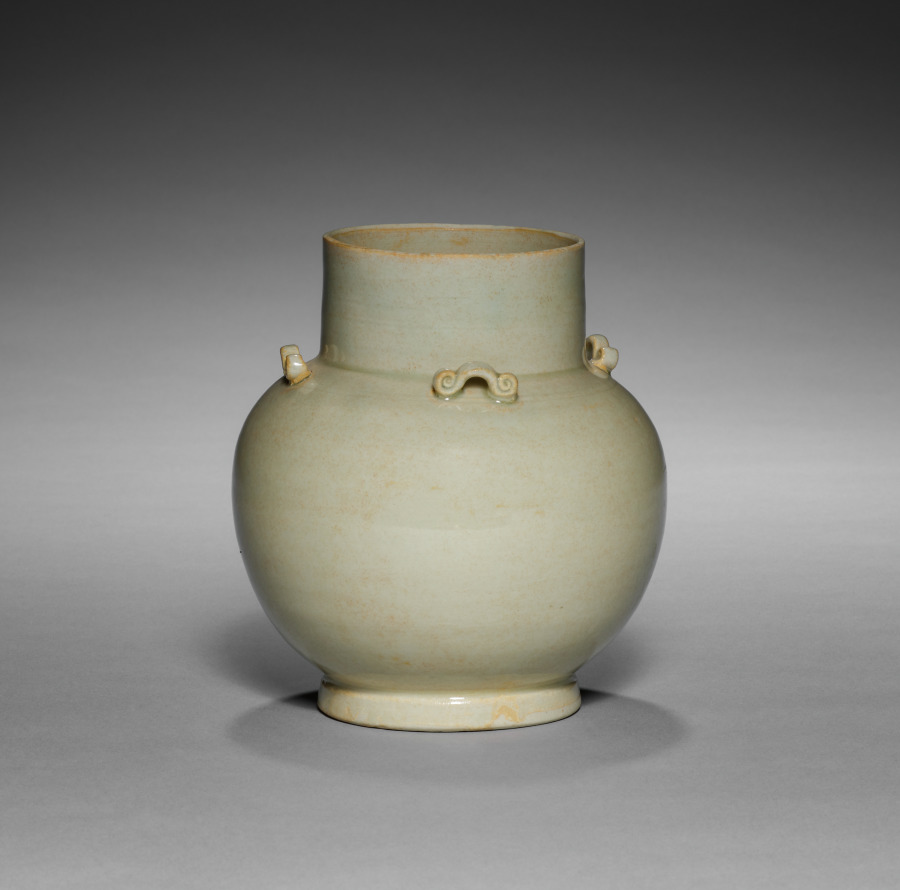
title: Globular Jar with Four Loops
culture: China, Southern Song dynasty (1127-1279)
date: 960–1279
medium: Porcelaneous ware of the qingbai type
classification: Ceramic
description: In the 900s, potters in southeast China excelled in producing white ceramics, including bluish-white (qingbai; 青白) glazed ware. The Keithleys’ jar was made when the qingbai ware–producing kilns were most active and manufactured their finest ware. The jar is missing its cover, which would have been flat with a loop in the center so that it could be tied in place with a string or silk cloth.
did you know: This container was probably used to store tea or grain.